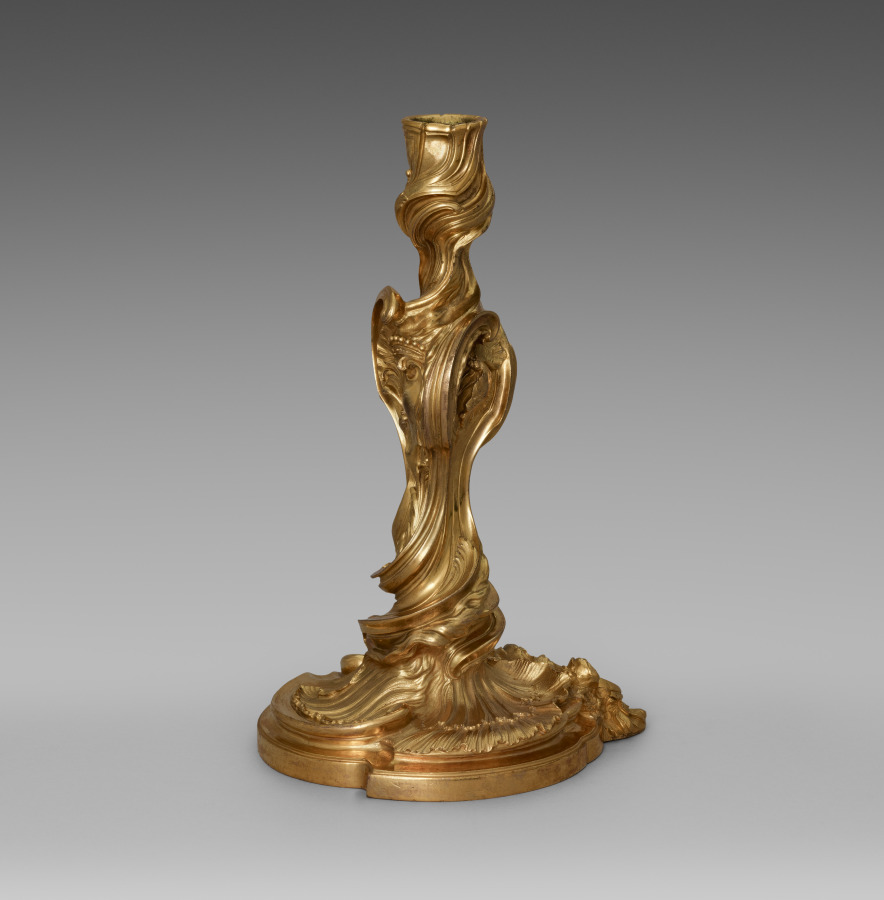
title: Candlestick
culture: France, 18th century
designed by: Juste-Aurèle Meissonnier (French, 1695–1750)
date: c. 1740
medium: gilt metal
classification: Furniture and woodwork